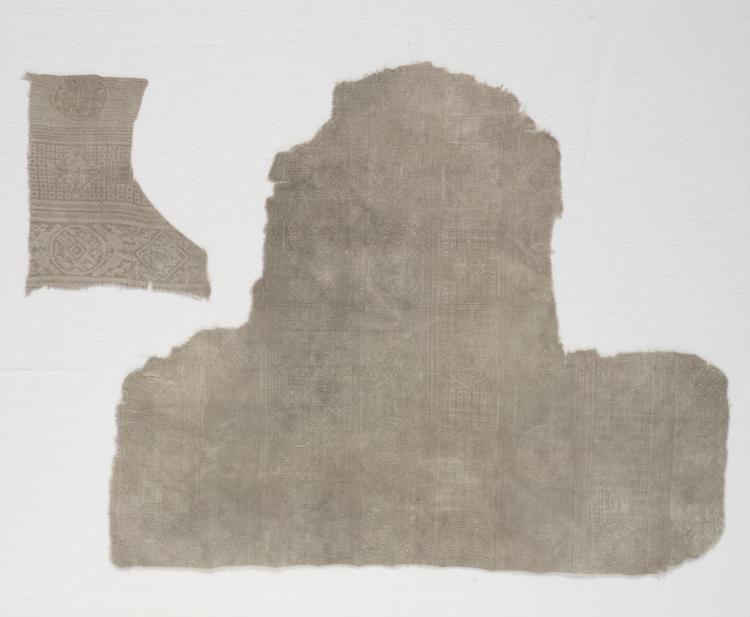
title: Fragment with inscriptions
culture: Iran, in the style of the Seljuq period (1037–1194)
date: before 1982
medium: Silk: lampas weave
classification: Textile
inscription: translation of Arabic inscription: "Peace, Happiness, The Mercy of God, Health, Generosity, Prosperity, Kingdom."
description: This silk fragment preserves a small-scale design organized in vertical stripes. Starting from the left edge, the first and fifth stripes contain in sequence a diamond enclosing a griffin, a rectangle containing an inscription, and an oval containing an inscription. Above and below each oval are paired birds; floral tendrils fill the interspaces. In the second and fourth stripes, diamonds containing rosettes are followed by rectangles containing inscriptions and then by octagons enclosing floral ornament and Arabic inscriptions. The third and seventh stripes are similar in that diamonds alternate with ovals against a very finely striped ground, but the ovals contain different inscriptions surrounded by leaves. The diamonds of the third stripe contain a palmette while those of the seventh stripe contain more Arabic and small leaves. The sixth and eighth stripes repeat, in sequence, an octagon with leaves and Arabic inscription, a rectangle with Arabic inscription, and a diamond filled with a floral device. The ground is ornamented with a small diaper pattern. Pairs of narrow bands containing disconnected chevrons or tiny repeated rectangles separate the stripes. The inscriptions repeat isolated words: Peace, Happiness, The Mercy of God, Health, Generosity, Prosperity, Kingdom.